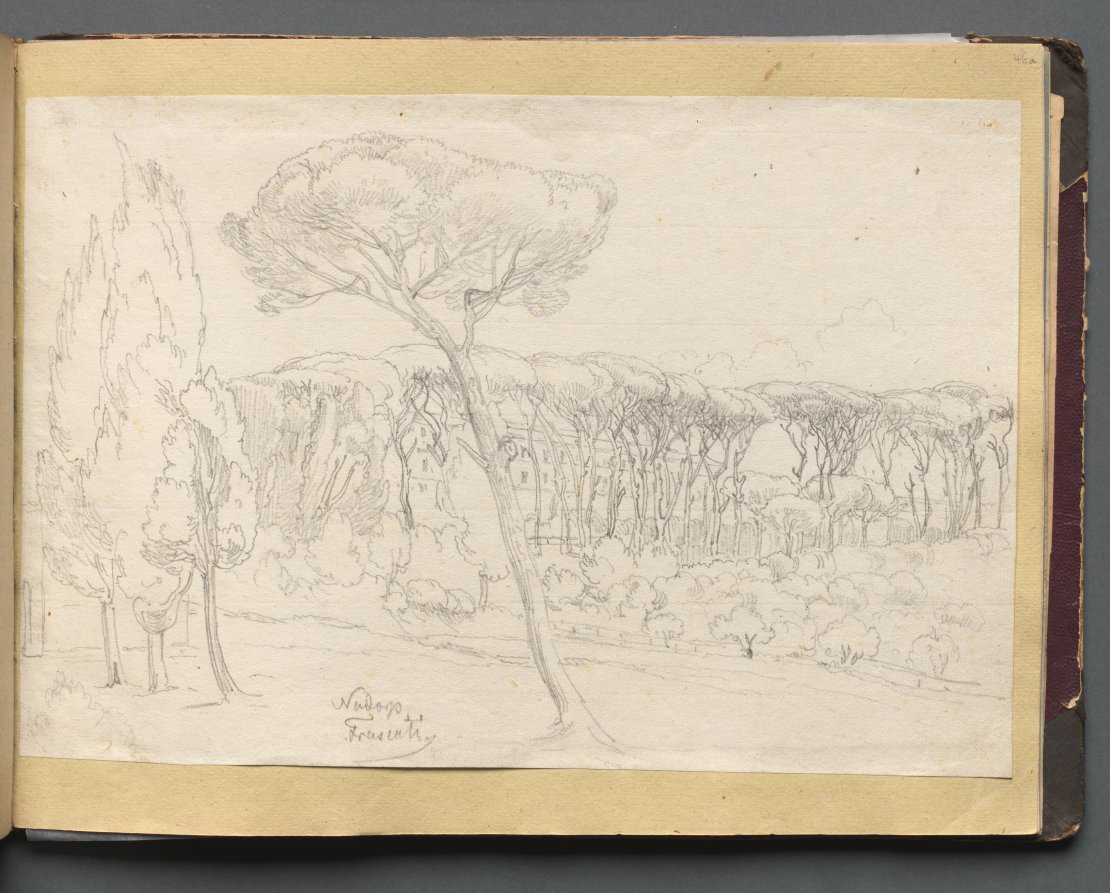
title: Album with Views of Rome and Surroundings, Landscape Studies, page 46a: "Frasciti"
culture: Germany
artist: Franz Johann Heinrich Nadorp (German, 1794–1876)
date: c. 1830s-70s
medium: graphite on white paper laid down on yellow paper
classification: Bound Volume